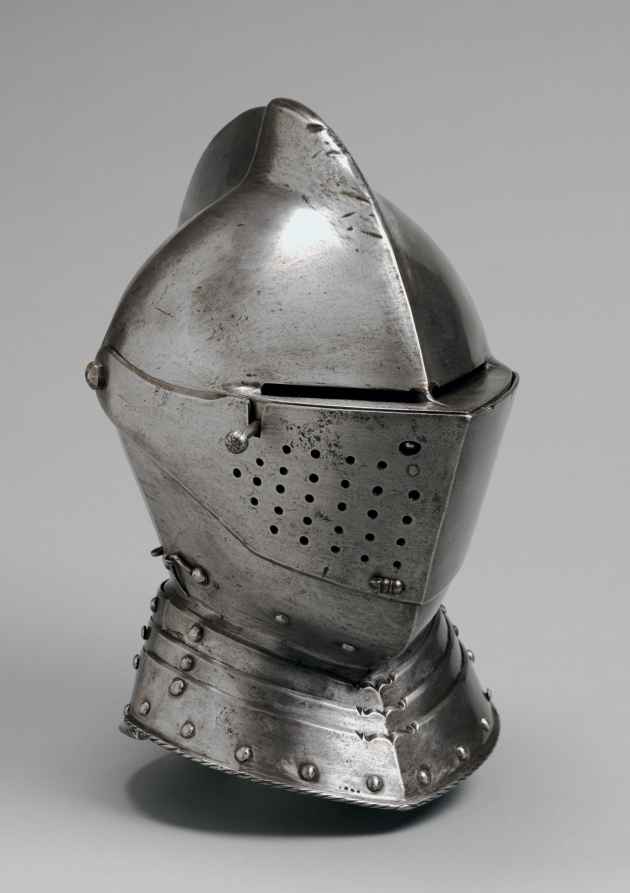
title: Helmet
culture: Germany, Saxony, 16th century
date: c. 1560–80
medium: steel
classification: Arms and Armor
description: This helmet was developed for the joust, a sporting combat of arms between two mounted contestants. This example shows the asymmetry of jousting armor. The participants rode along a wall-like barrier known as a "tilt" with their left sides facing. Consequently, armor on that side of the body tended to be thicker. The breath holes in the helmet were placed on the right side (farthest from an opponent's lance) to avoid injuries from splinters. The popularity of jousts and tournaments peaked around 1500 and required armor and other sporting equipment adapted for the endlessly varied games. By the reign of Emperor Maximilian I (1493–1519), there were at least 11 different forms of mounted jousts, exclusive of the numerous ceremonial combats on foot using such weapons as swords, halberds, pikes, and throwing axes. Each blow in the contest, especially favored in Germany, was carefully numbered and prescribed by rules.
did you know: Jousting contestants wore armor and charged at each other full speed on horseback, attempting to dismount the other with a lance. Such equipment protected contestants from injury, much like the helmet worn by football players today.